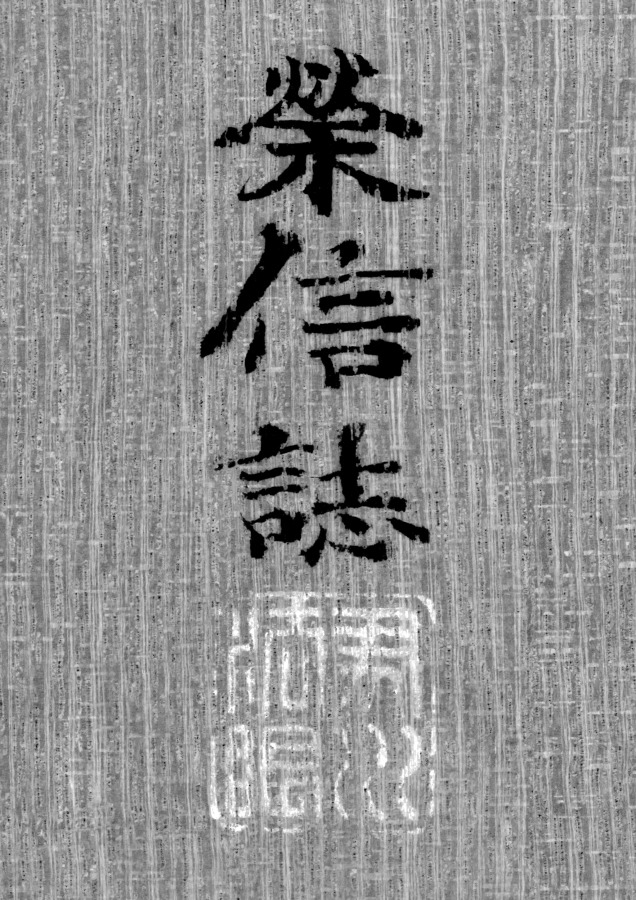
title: Reeds and Geese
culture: Japan, Kamakura period (1185–1333)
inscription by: Yishan Yining [Issan Ichinei] (Chinese, 1247–1317)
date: 1314–17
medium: hanging scroll; ink on paper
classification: Painting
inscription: signed: Issan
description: Reeds and geese has been a common pairing in Chinese literary and visual culture for many centuries. This painting presents the contribution of a Japanese amateur painter, almost certainly a Zen Buddhist monk, to Japan’s fledgling efforts to add the theme to its own cultural vocabulary in the early 1300s. As was customary at the time in Japan, the painter did not sign or seal his work; the inscription, a poem added to the painting by the eminent émigré monk Yishan Yining, along with his signature and seal, was of far greater cultural value. Today, the modestly sized painting has tremendous significance as one of the earliest surviving examples of Japanese ink paintings with reeds and geese.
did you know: Tokyo National Museum owns a copy of this painting made by Kano Gyokusen (1796–1864) when he was 14 years old.